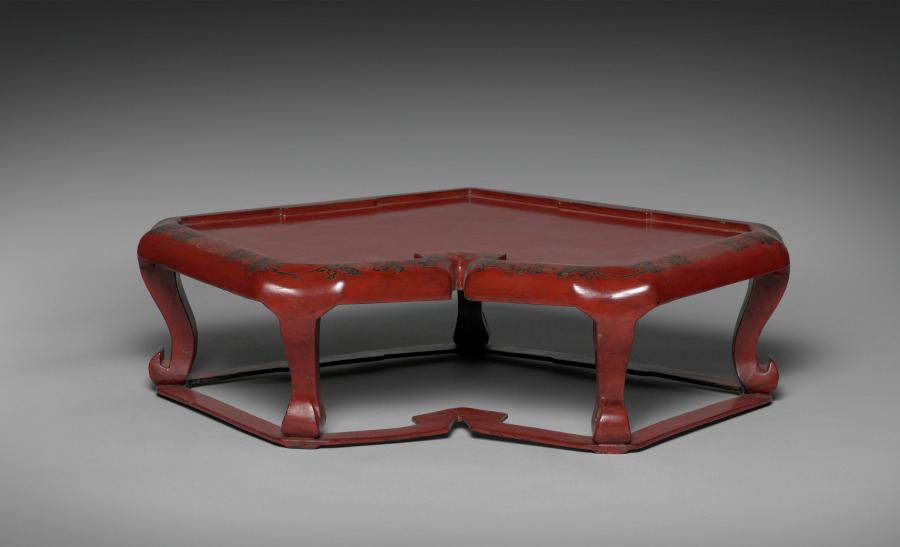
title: Stand for Tiered Boxes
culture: Japan, Edo period (1615–1868)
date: late 1700s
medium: red lacquer over a wood core, with litharge painting and engraved gold designs (Ryukyuan)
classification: Lacquer